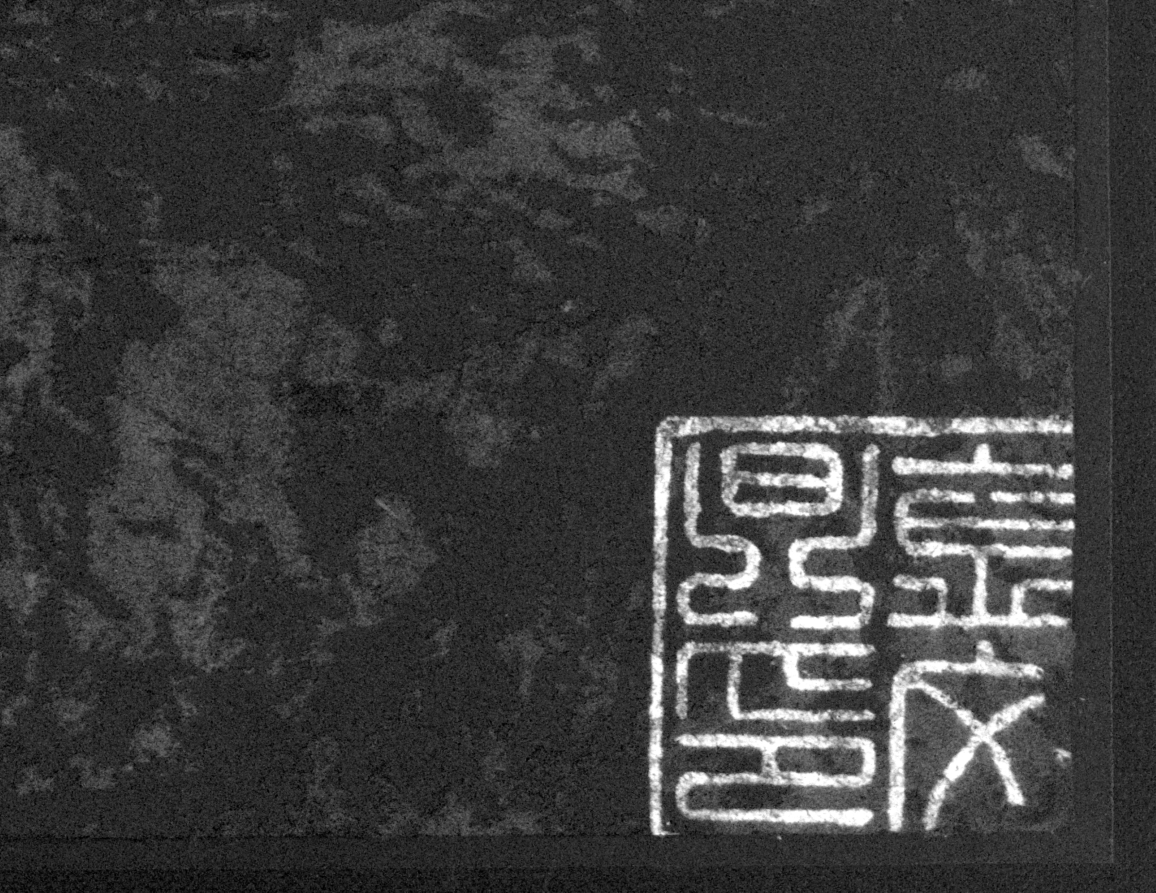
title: Writing Books under the Pine Trees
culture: China, Yuan dynasty (1271-1368)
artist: Wang Meng (Chinese, c. 1308–1385)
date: c. 1308–85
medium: Album leaf; ink and color on paper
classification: Painting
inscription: Artist's inscription, signature, and seal: Many years and months passed by the locked gate/ Behind which the scholar has been immersed in writing his books;/ While the pine trees he had planted/ Have all grown up with old dragon scales./ The Yellow Crane Mountain Woodcutter [Huang-ho-shan-ch'iao] painted this for Chen-su [the hao of Ts'ao Chih-po]. [seal] Wang Meng yin.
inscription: 2 additional seals: 1 of Ts'ao Chih-po (1271–1355); 1 unidentified.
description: Wang Meng, born into a distinguished family in Wuxing (modern Huzhou), Zhejiang province, was the maternal grandson of Zhao Mengfu (1254–1322). Aside from intermittent political commitments under the foreign Mongol and Ming governments, Wang dedicated most of his life to retirement, as conveyed in this painting. By the 1360s, when the Red Turbans began to rebel against the Yuan dynasty leaders, and the Mongols gradually lost control over Jiangnan, Wang Meng withdrew into the mountains north of Hangzhou, calling himself Woodcutter of Yellow Crane Mountain. In the early years of the Ming dynasty, Wang was caught up in a purge and died in prison.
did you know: Wang Meng wrote the inscription at the right in classical seal script and applied his signature and seal on the left side of the composition.